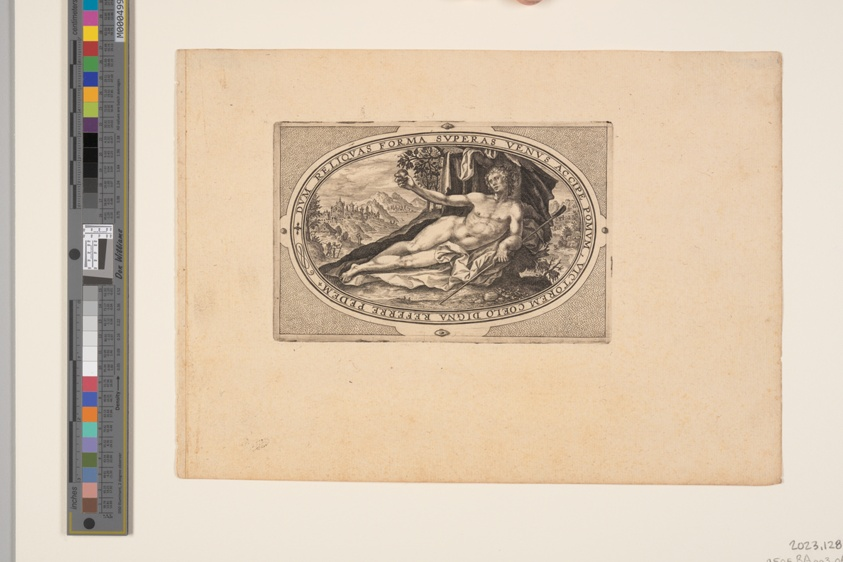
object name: Print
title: Paris, from Gods and Goddesses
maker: Crispijn van de Passe I; Dutch, c. 1565–1637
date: 1592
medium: Engraving on paper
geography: Netherlands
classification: engraving; paper; print; prints and drawing